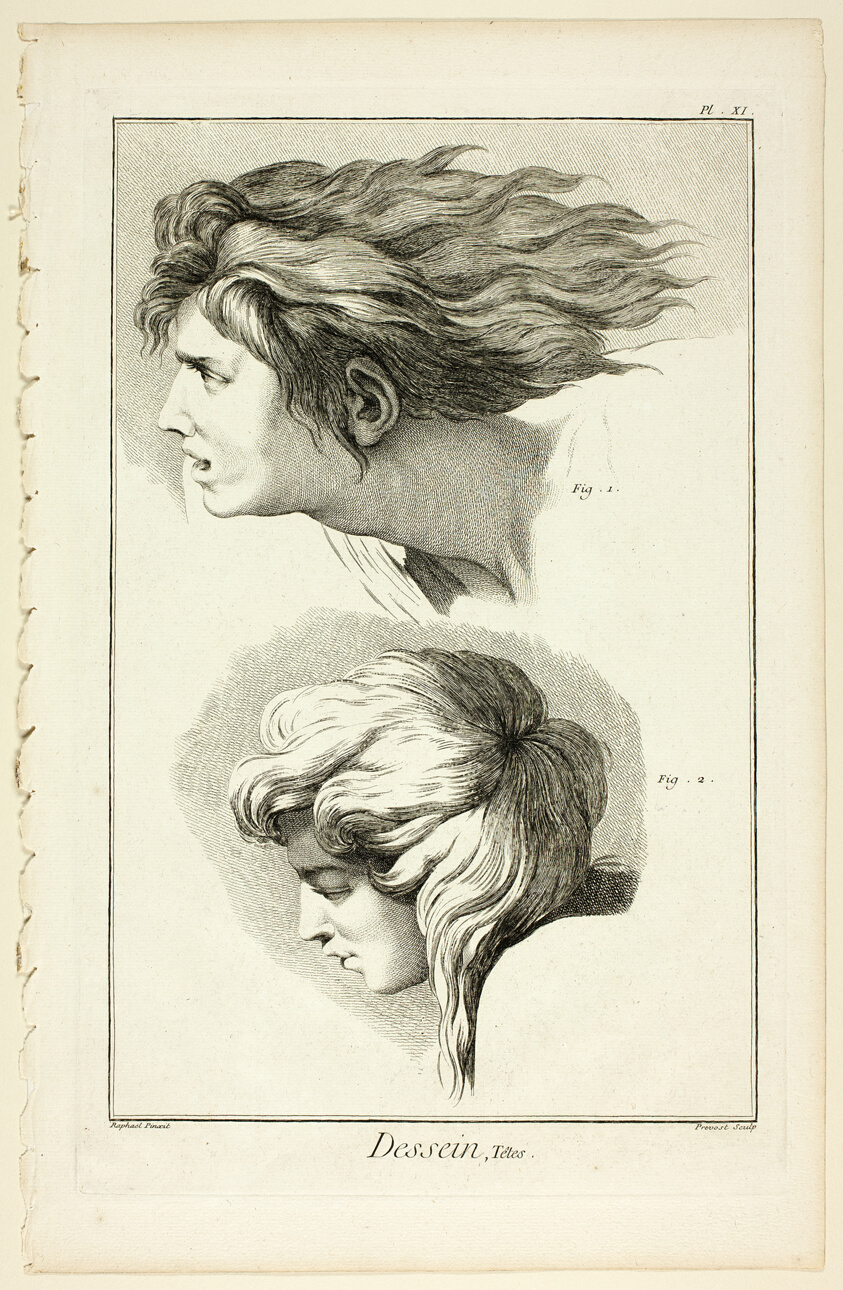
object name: Print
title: Design: Heads, from Encyclopédie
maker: Benoît-Louis Prévost (French, c. 1735-1809); after Raffaello Sanzio, called Raphael (Italian, 1483-1520); published by André le Breton (French, 1708-1779), Michel-Antoine David (French, c. 1707-1769), Laurent Durand (French, 1712-1763), and Antoine-Claude Briasson (French, 1700-1775)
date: 1762/77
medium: Etching, with engraving, on cream laid paper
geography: France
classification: etching; print; prints and drawing